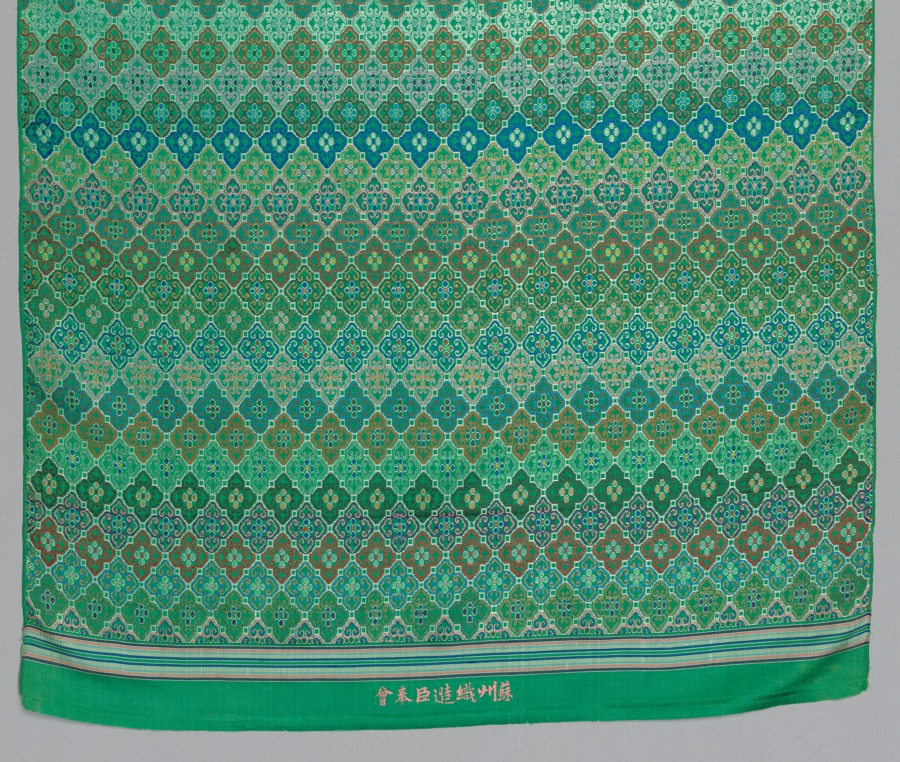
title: Woven Loom Piece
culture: China, Suzhou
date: 1800–1825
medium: lampas, silk and gold thread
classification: Textile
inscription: Within the selvage's green band is an inscription indicating that the piece was woven at the Imperial Textile Works of Suzhou and giving the name of the superintendent of the works.